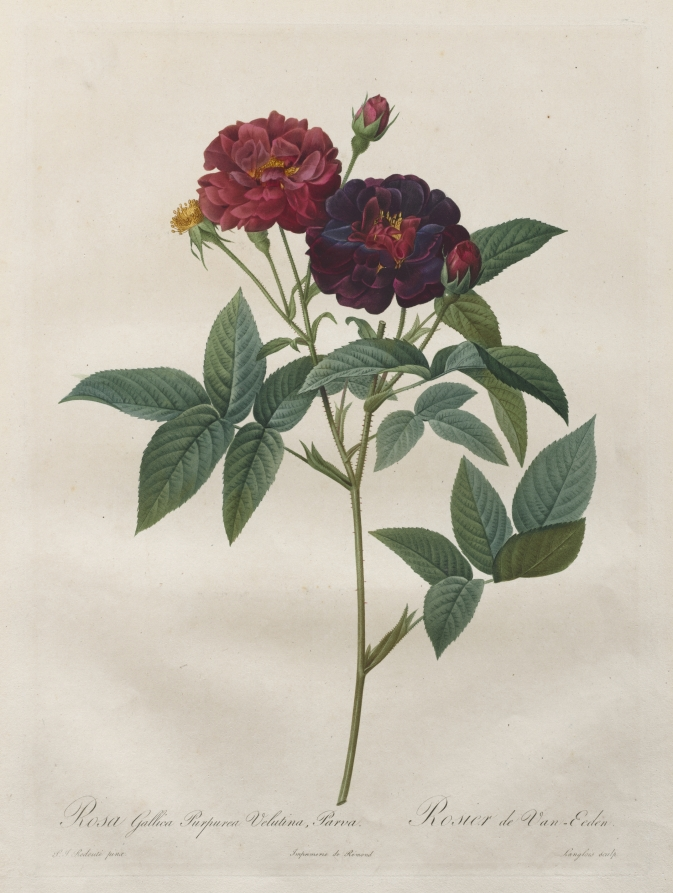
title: The Roses: Rosa Gallica Purpurea Velutina Parva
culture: France, 19th century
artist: Langlois (French)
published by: Pierre-Joseph Redouté (French, 1759–1840)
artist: after Henri Joseph Redouté (French, 1766–1853)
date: 1817–24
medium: color stipple engraving with watercolor added by hand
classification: Print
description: The subtle tones in Redouté’s paintings nearby were faithfully captured by engravers, but the prints do not imitate the spontaneity and deftness of the master’s brushwork, which carefully described every detail. The drawings were interpreted using the most skillful and refined stipple engraving but relied on a combination of printed and hand coloring. A thin wash of watercolor that closely matches the printing ink was meticulously applied over every part of the image, with an occasional use of contrasting tints for the highlights.